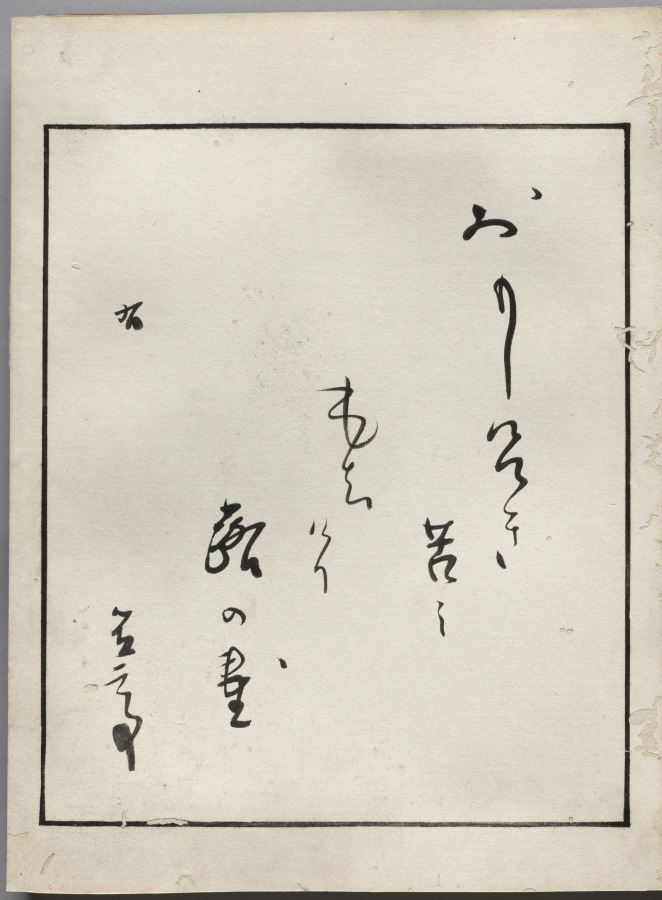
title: Double-Leaf from Album of Actor Portraits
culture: Japan, Edo period (1615–1868)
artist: Shōrakusai (Japanese)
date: c. 1790–1810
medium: double-leaf from an accordion-style album; ink and color on silk (right) and ink on paper (left)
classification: Bound Volume